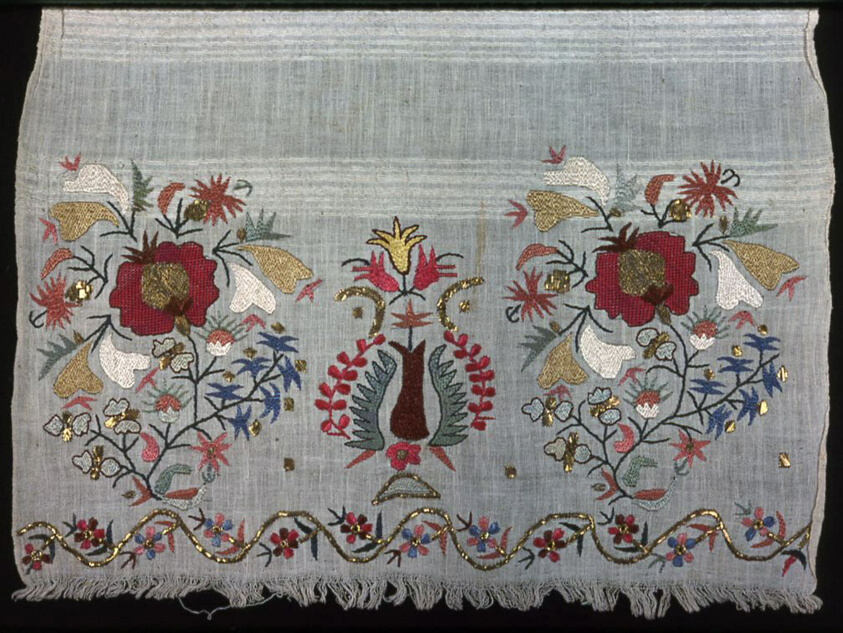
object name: Textile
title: Panel (Towel?)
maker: Greece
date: 19th century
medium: Cotton, plain weave; embroidered with silk, gilt-metal-strip, and gilt-metal-strip-wrapped cotton, pulled thread work in Russian overcast filling stitches and embroidered in flat double running, twined double running, overcast and satin stitches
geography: Greece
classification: textile; needlework (visual works)